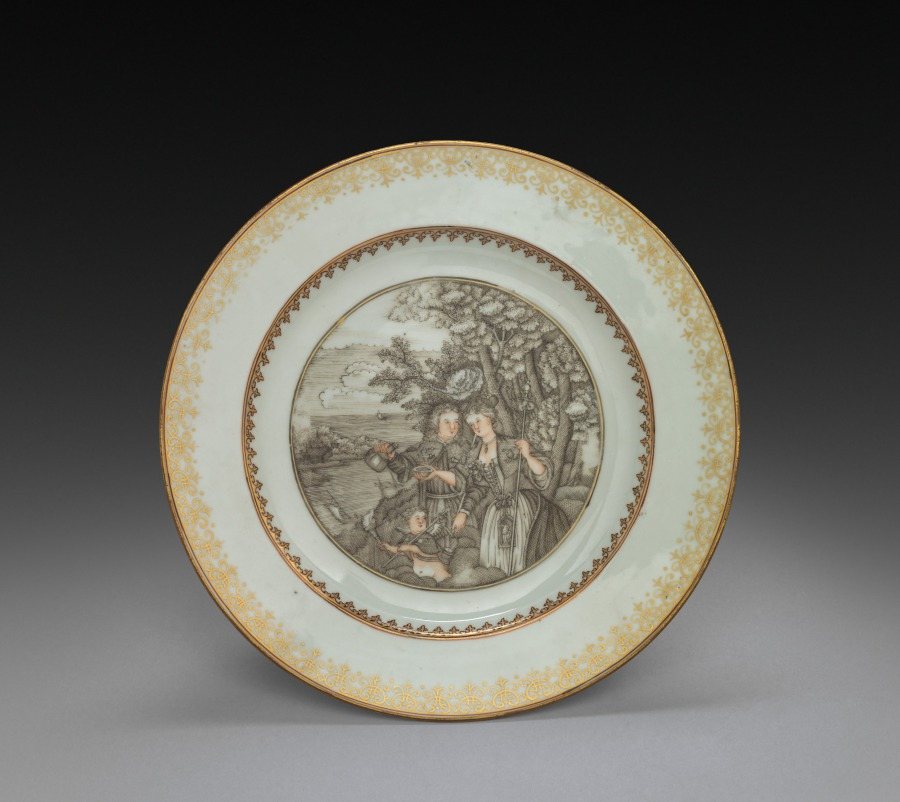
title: Plate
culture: China, Chinese Export, 18th century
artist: after a design by Bernard Picart (French, 1673–1733)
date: c. 1750–1760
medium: porcelain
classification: Ceramic